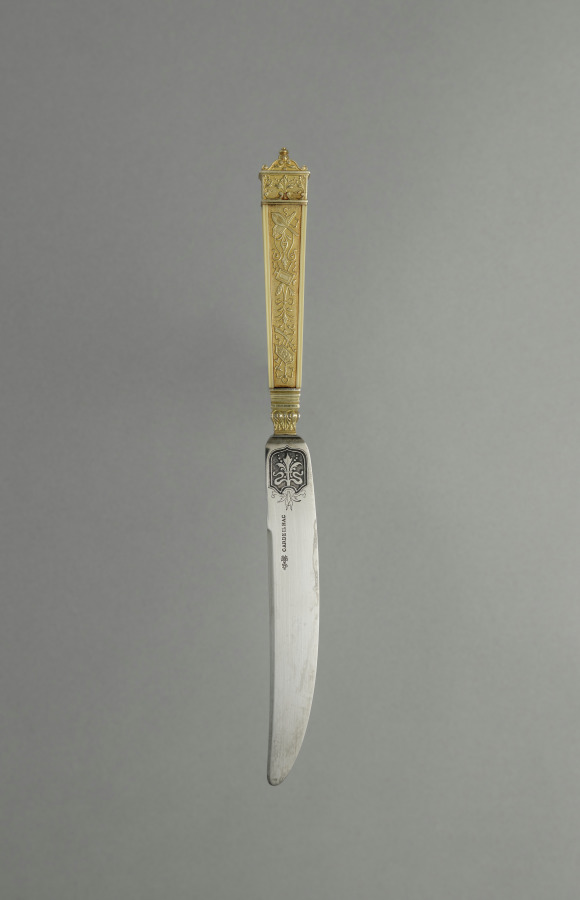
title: Dessert Knife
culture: France, 19th century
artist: Maison Cardeilhac (French)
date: c. 1880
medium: gilt silver and ivory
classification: Silver